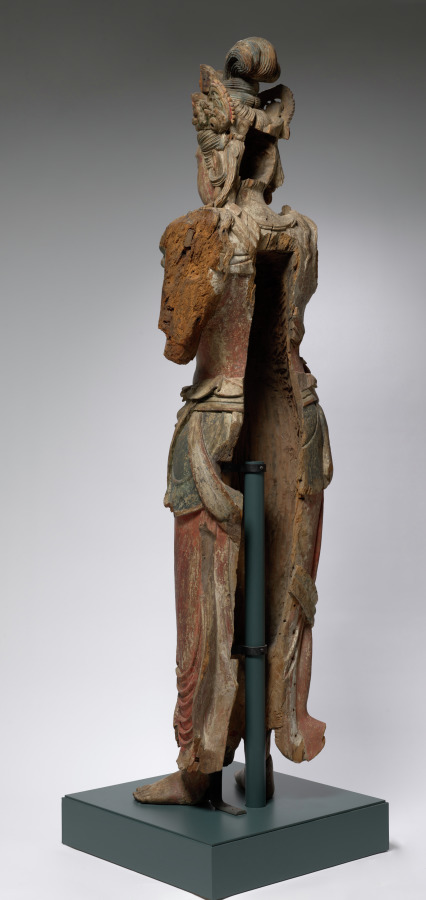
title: Eleven-Headed Guanyin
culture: China, late Northern Song dynasty (960-1127) - Jin dynasty (1115-1234)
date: 1100–1200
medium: wood with polychromy and cut gold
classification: Sculpture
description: The bodhisattva is an enlightened being dedicated to the spiritual awakening of all beings. The compassionate bodhisattva Guanyin, in a variety of manifestations, is probably the most popular deity of worship in Chinese Buddhism. In the Esoteric Buddhist form shown here, this standing Guanyin has a total of eleven heads, with smaller ones above the principal head. The uppermost head represents the Buddha Amitabha, to whom he is closely related. The eleven heads symbolize the Buddha’s steps on the path to enlightenment.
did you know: This Guanyin is carved from a single block of willow (genus Salix sp.).